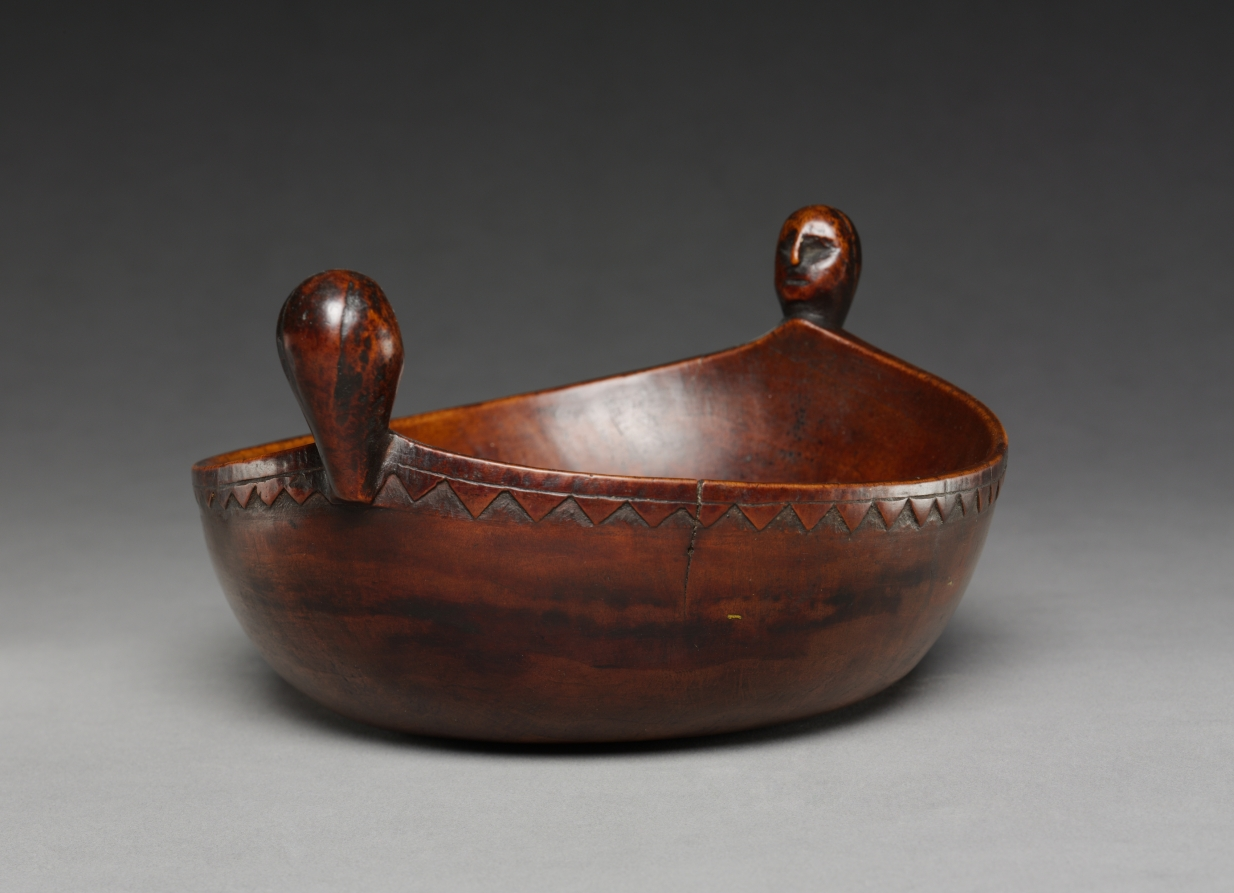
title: Bowl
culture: Native North America, Northeastern Woodlands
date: early 1800s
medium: wood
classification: Wood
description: Fine wooden bowls were often used during feasts in the Northeastern Woodlands. The heads on the rims may represent spirit beings, perhaps the owner’s guardian spirits, acquired through dreams or visions—thought to be the ultimate sources of truth. The medium may also be profoundly meaningful. A Great Lakes (Meskwaki) Native said in 1911, “The murmur of the trees when the wind passes through is but the voices of our grandparents. Often a whole forest hums with talk . . . we often hear the sound of their laughter and the sound of their lamentations.”